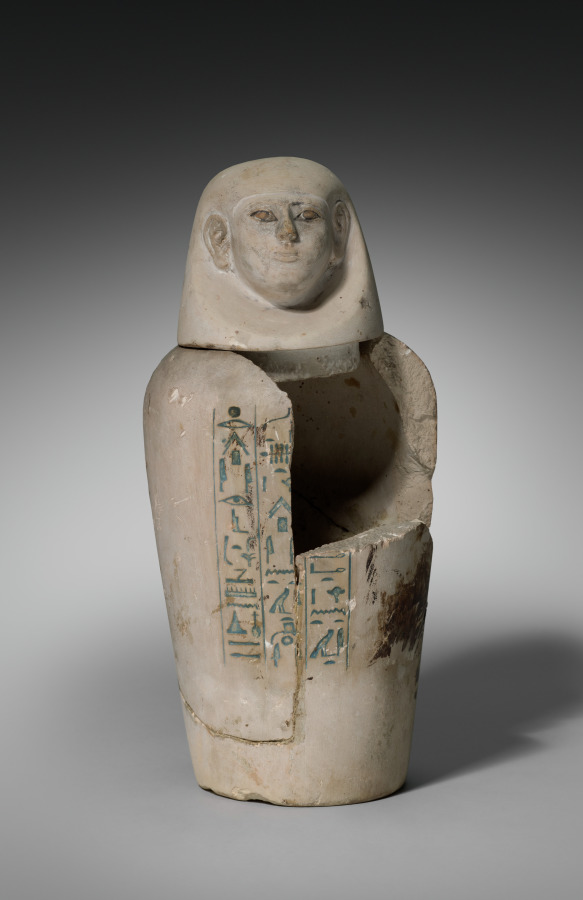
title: Canopic Jar with Lid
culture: Egypt, New Kingdom (1540–1069 BCE), Dynasty 18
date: 1540–1296 BCE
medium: limestone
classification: Funerary Equipment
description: In the process of mummification certain organs, the liver, lungs, stomach, and intestines, were removed, embalmed separately , and stored in jars known as canopic jars. Although this jar and another from the collection (1914.630) were presumably from the same individual and therefore the same set, they differ in their materials, workmanship, size, and style of inscriptions. Made of a different limestone this jar, the smaller of the two, has a lid in the form of a rather ludicrous male head. It is clearly by another hand. A sizable fragment is lost from the body. IN contrast to the poor quality of the head, the handsome inscription on the body is deeply cut and filled in with a blue pigment. It reads, "[Words spoken by Nephathys:] 'May your arms embrace that which is in you. May you protect Hapy, who is in you, and the honored one before Hapy, the Osiris, the royal herald, Gregmennefer, vindicated."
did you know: Canopic jars are named after the Greek sailor Canopus, who was said to be buried at Canopus (Abuqir) in the western delta and worshipped there in the form of a human-headed jar. It was actually a form of Osiris and had nothing to do with internal organs, but the term has stuck.